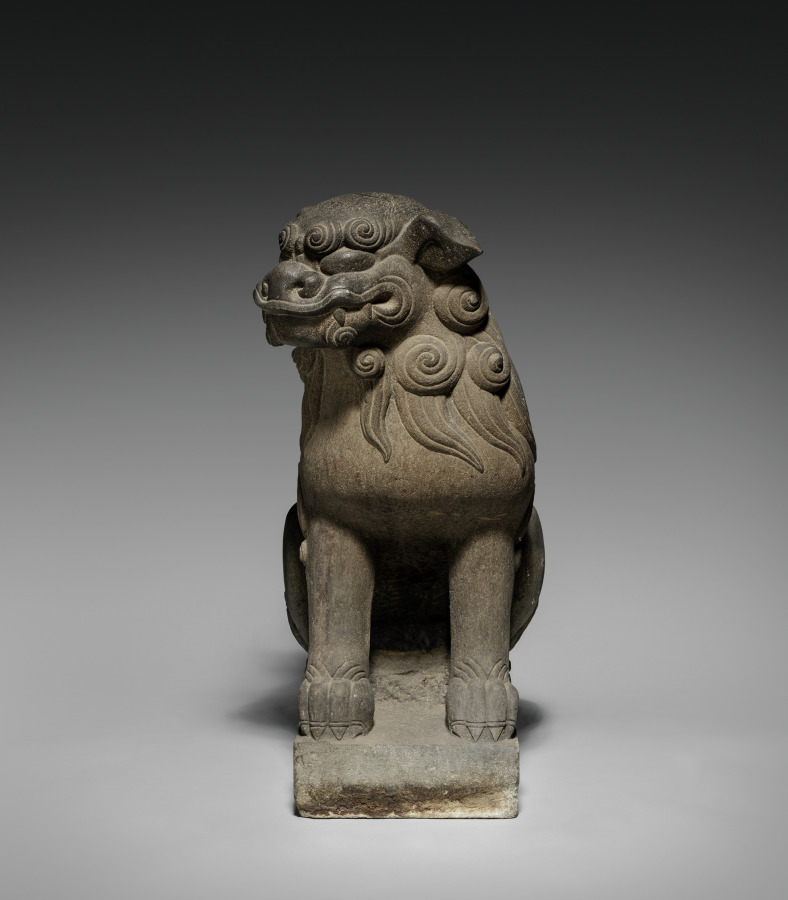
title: Lion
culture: Japan?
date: c. 1800s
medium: gray schist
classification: Sculpture